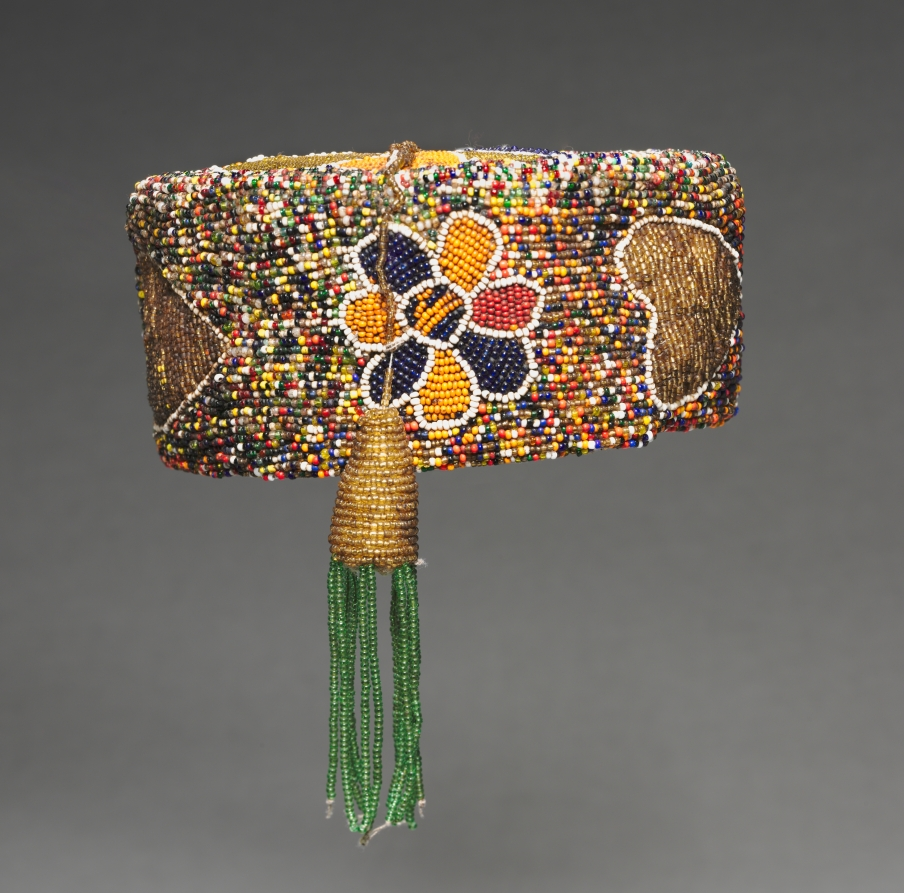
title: Coronet (oríkògbófo)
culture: Africa, West Africa, Nigeria, Yorùbá-style maker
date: 1900s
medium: Cloth, glass beads, and thread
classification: Garment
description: Like the rare conical crown (ade), the coronet (oríkògbófo) may only be worn by a king descended from Oduduwa, the first king of the Yorùbá. While the crown is reserved for special occasions, the coronet may be used by the king for less formal public events and when entertaining non-Yorùbá visitors. It signifies wealth rather than royal status.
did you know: The beads on this sculpture were imported, likely from Venice or Bohemia (now called the Czech Republic).